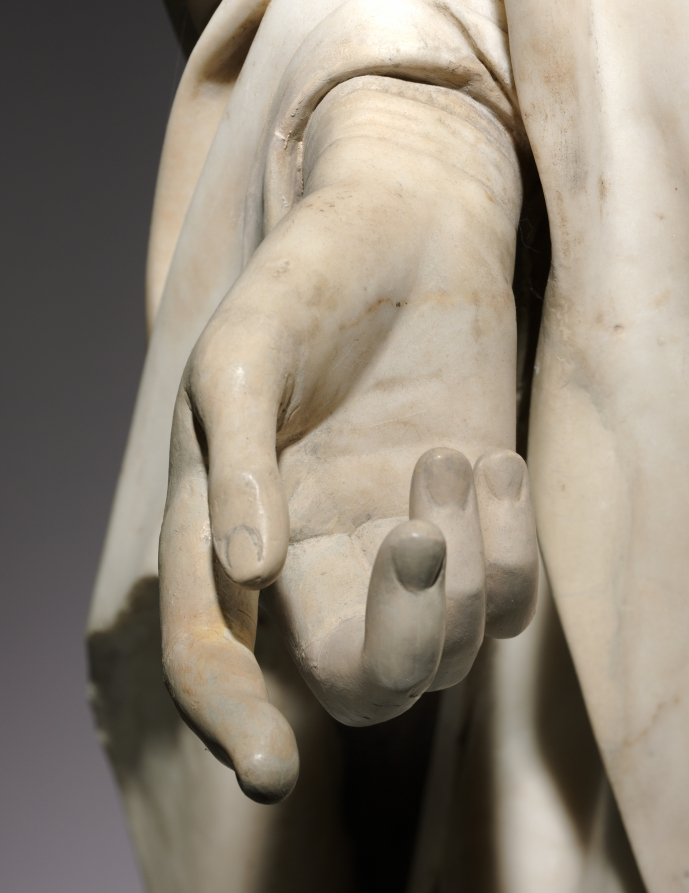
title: Saint Margaret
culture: Italy, Sicily, Palermo, 16th century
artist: Antonello Gaggini (Italian, 1478–1536)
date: c. 1520–1530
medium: marble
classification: Sculpture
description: Gaggini was a member of a large family of sculptors whose Palermo workshop supplied monumental religious sculptures for the cathedrals of Palermo and Messina in Sicily and Montelione in Calabria. After 1507 Antonello himself worked for 15 years to produce marble sculptures for Palermo Cathedral. This figure of the legendary virgin martyr, Saint Margaret, was probably commissioned for one of these ecclesiastical foundations, possibly the chancel of Palermo Cathedral. The saint is shown reading from a book of hours (a sign of her piety) and trampling upon a dragon, the symbol of Satan. The dragon became the attribute by which she is recognized in sacred art.